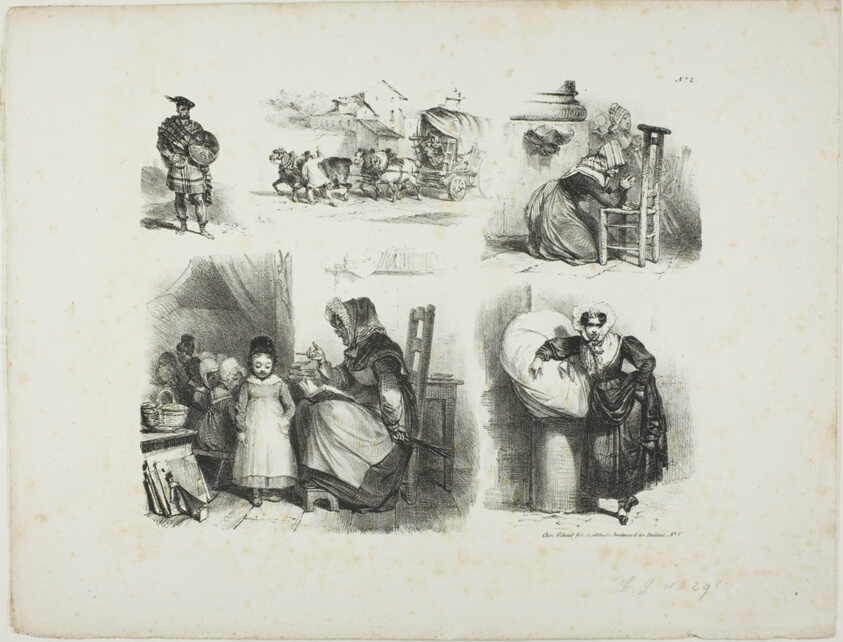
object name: Print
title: Sheet of Sketches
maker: Denis Auguste Marie Raffet (French, 1804-1860); published by Chez Gihaut Frères (French, 19th century); printed by François le Villain (French, active 19th century)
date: 1828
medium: Lithograph in black on ivory wove paper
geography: France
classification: lithograph; print; prints and drawing